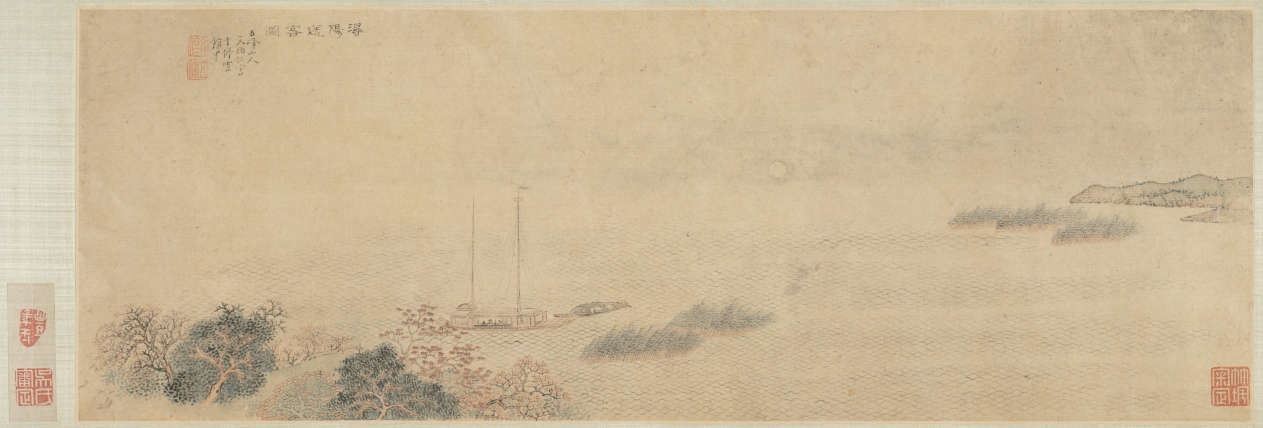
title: Saying Farewell at Xunyang (Song of the Pipa)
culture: China, Ming dynasty (1368–1644)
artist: Wen Boren (Chinese, 1502–1575)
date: 1500s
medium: handscroll, ink and color on paper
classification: Painting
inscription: "潯陽送客圖" 五峰山人文伯仁寫于停雲館中 [印] 文伯仁; 五峰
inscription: 2 colophons and 9 additional seals: 1 transcription of "Pipa xing 琵琶行” (Song of Pipa) and 3 seals of Zhu Yizun 朱彜尊 (1629-1709); 2 seals of Wu Rongguang 吳榮光 (1773-1843); 1 colophon, dated 1826, and 3 seals of Wu Xijia 吳錫嘉 (mid-1700s)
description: This handscroll depicts The Song of the Pipa, a poem by Bai Juyi 白居易 (772–846) written after the poet’s encounter with a pipa player on the Yangzi River. Expelled from her home city when her beauty and fame had faded, she played for the poet at night. Her musical performance and tragic life story resonated with Bai Juyi, who had just been demoted and exiled from life at court himself. The hazy, vast view and pale color tonalities of this painting illustrate these feelings of endless sadness, having lost one’s sense of purpose in life.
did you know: Wen Boren depicted the chilly autumn water with a fishnet pattern.